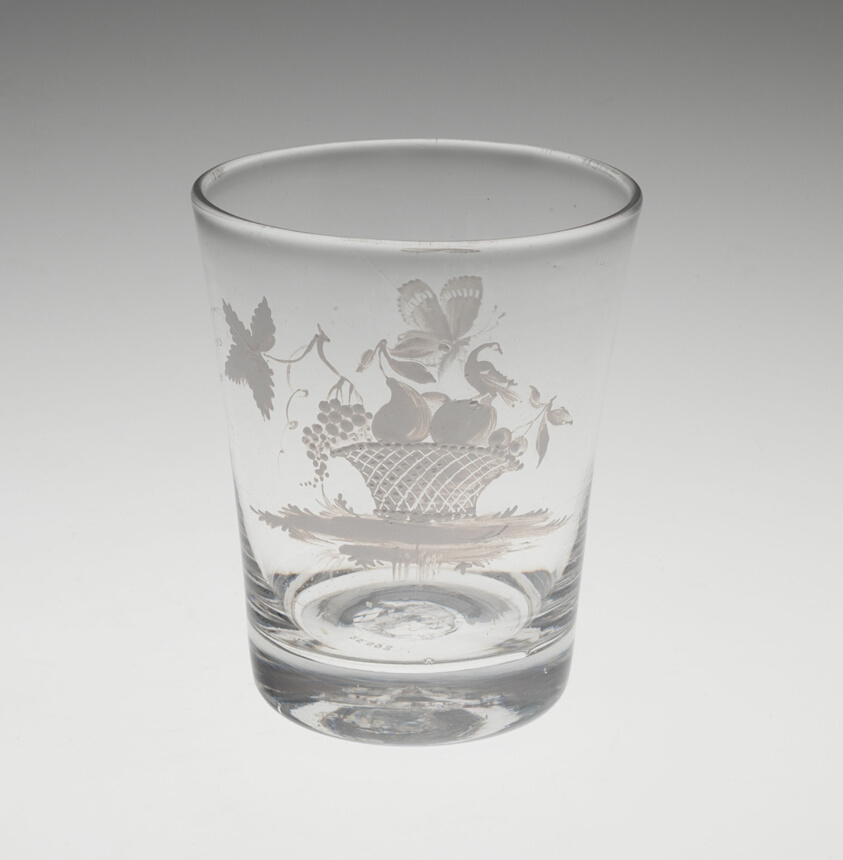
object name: Glass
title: Beaker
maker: England, Newcastle; Made by William Beilby (English, 1740-1819)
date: c. 1770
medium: Glass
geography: England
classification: glass; european decorative arts